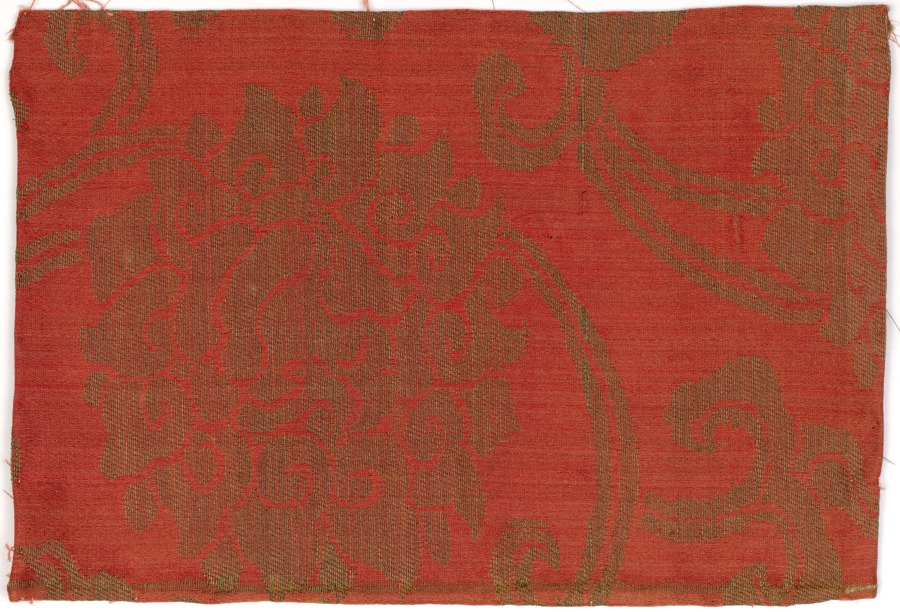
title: Textile Fragment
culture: Japan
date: 1800s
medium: silk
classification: Textile